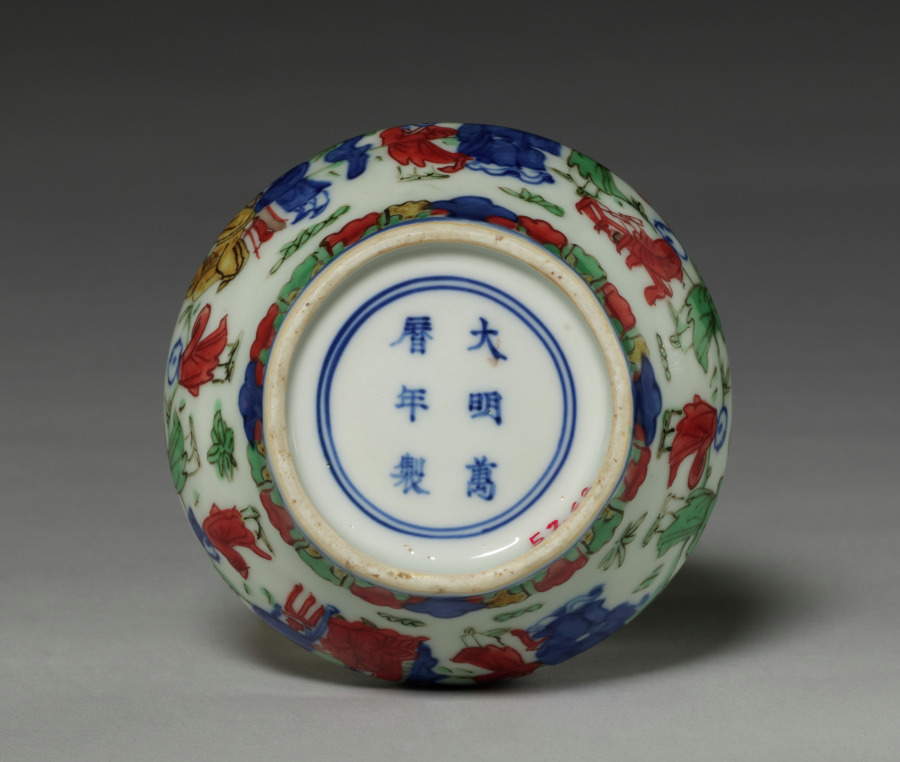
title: Covered Jar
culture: China, Jiangxi province, Jingdezhen kilns, Ming dynasty (1368-1644), Wanli reign (1573-1620)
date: 1573–1620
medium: porcelain with blue underglaze decoration and overglaze enamels in red, green, and yellow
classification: Ceramic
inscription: 大明萬曆年製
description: In the Ming (1368–1644) and Qing (1644–1911) dynasties, luxury items became more affordable to larger parts of the society, including women, merchants, and literati in non-official positions. Imperial patronage and a growing urban population encouraged consumption of luxury goods and local craftmanship. This covered porcelain jar has blue underglaze and overglaze in red, green, and blue enamels. It shows Ming dynasty advancements in porcelain decoration and the creative mind of the talented artisans who made it.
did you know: This jar is painted with 16 figures of all ages enjoying a garden setting.